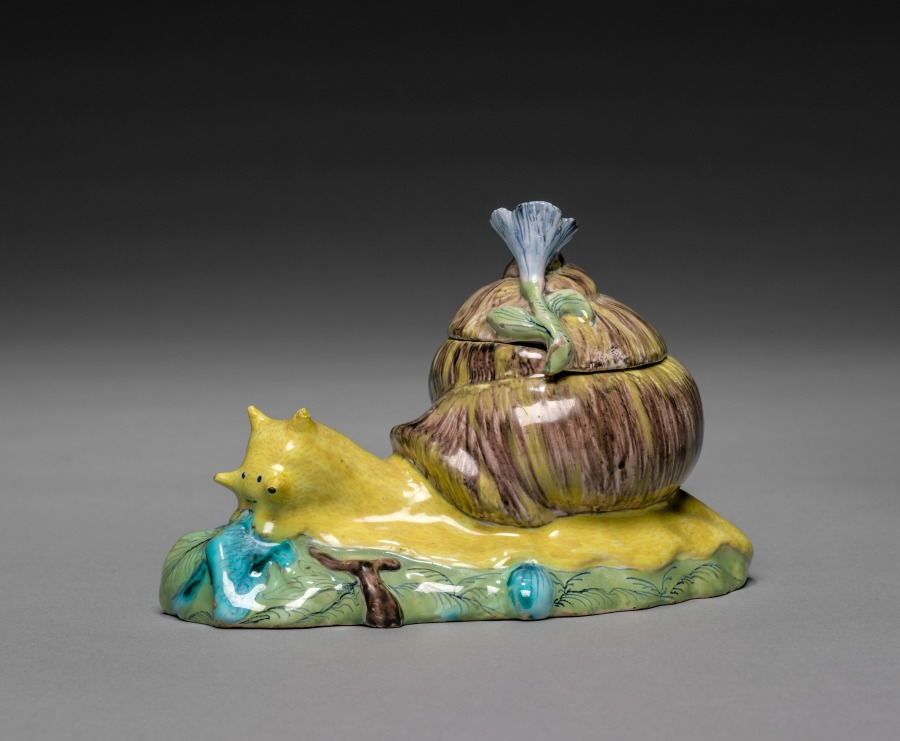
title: Covered Box in the Form of a Snail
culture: France, 18th century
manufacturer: Strasbourg Factory (France)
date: c. 1750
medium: faience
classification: Ceramic